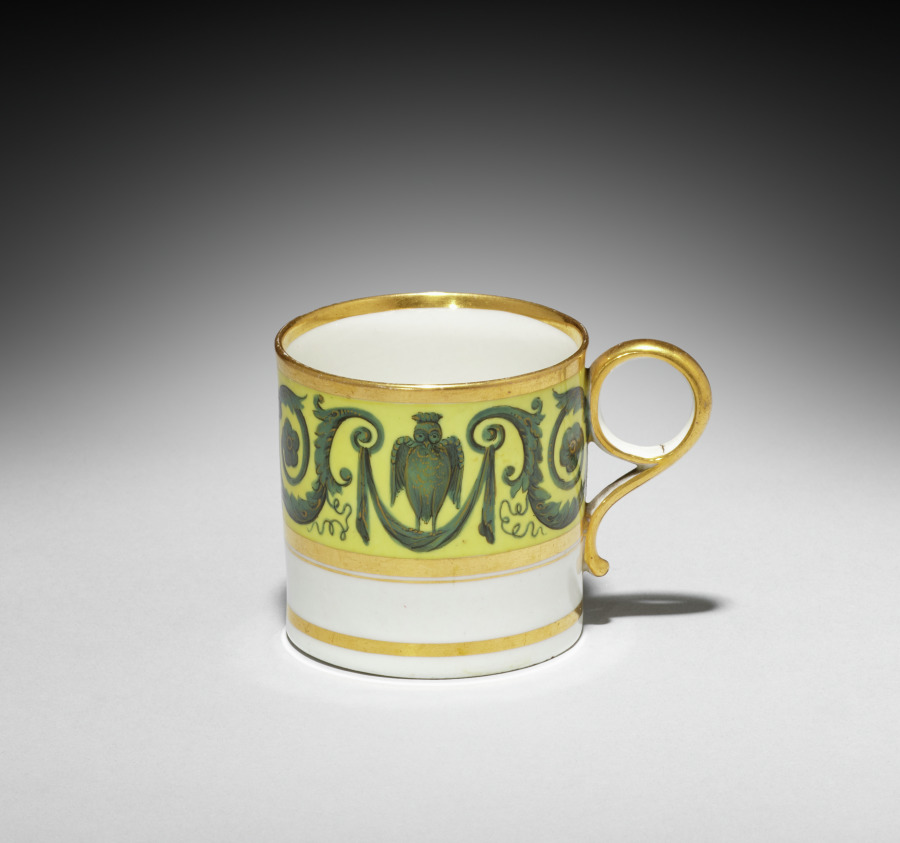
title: Cup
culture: England, 19th century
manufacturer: Worcester Porcelain Factory (British, established 1751)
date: 1807–1813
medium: porcelain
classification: Ceramic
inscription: in overglaze red: "Barr, Flight and Barr/ Royal Porcelain Works/ Worcester/ London -- House/ Flight & Barr/ Coventry Street," surrounded by: "Manufacturers to their Majesties Prince of Wales and Royal Family. Established 1751."